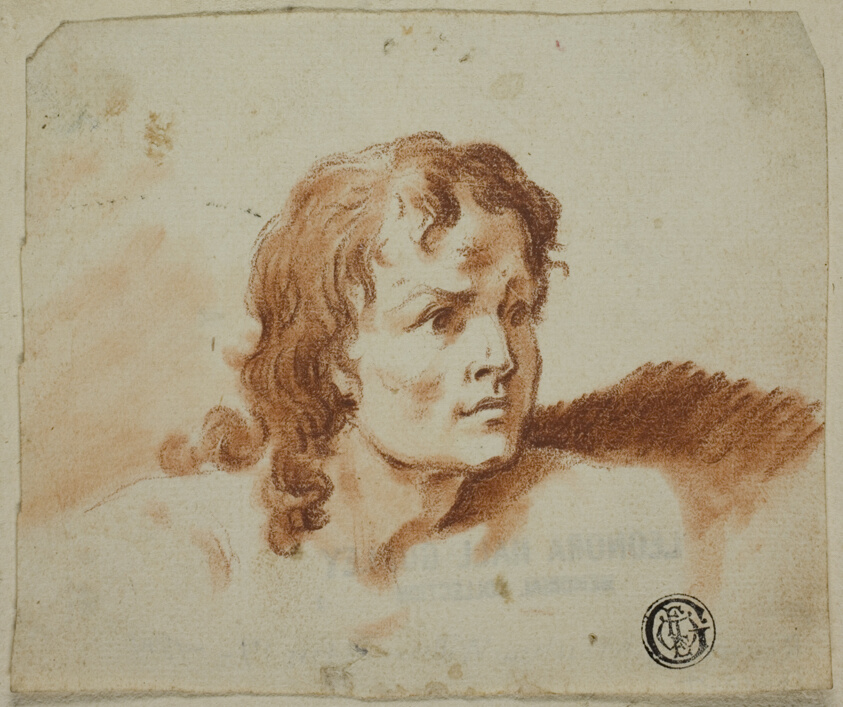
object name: Drawing and Watercolor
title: Bust of a Youth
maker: Attributed to Rev. Matthew William Peters; English, 1742-1814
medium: Red chalk, with stumping, on cream laid paper, tipped on cream laid paper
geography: England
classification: chalk; drawings (visual works); prints and drawing